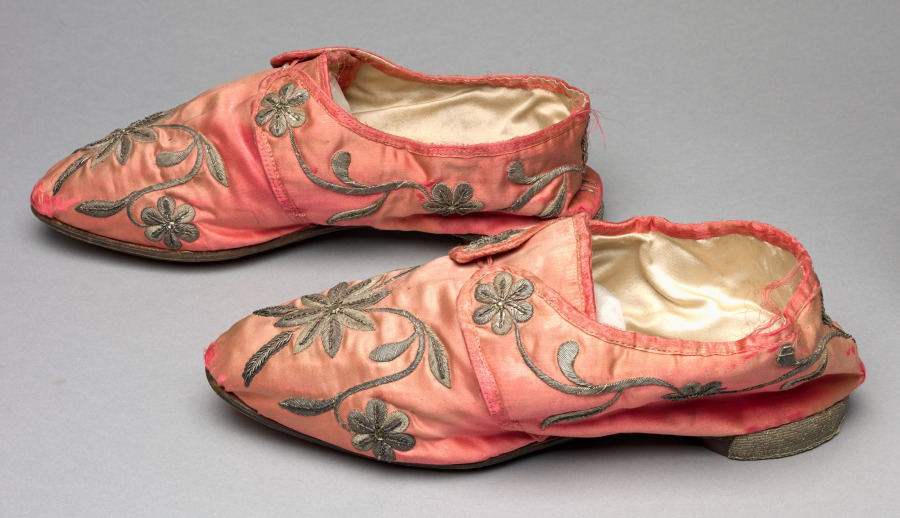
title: Pair of Slippers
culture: Italy, Venice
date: early 1700s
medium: Silk: satin weave with silver metal thread embroidery and trim; spangles; leather soles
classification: Garment